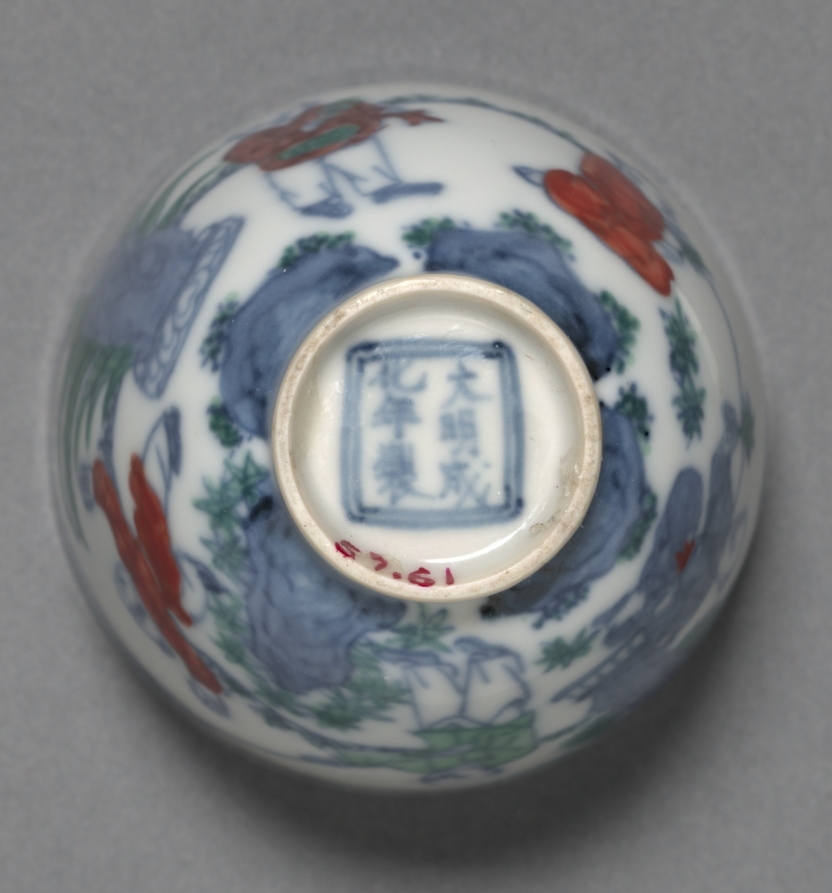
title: Wine Cup with Children at Play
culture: China, Jiangxi province, Jingdezhen, Ming dynasty (1368-1644), Chenghua mark and period (1465-1487)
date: 1465–87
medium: porcelain with underglaze blue and overglaze enamel decoration, docai ("joined colors") ware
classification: Ceramic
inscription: 大明成化年製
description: This delicate wine cup, only two inches high, exhibits free, spontaneous drawing as well as perfect compositional balance over its small surface area. The motifs were outlined with cobalt blue; the piece was then glazed and fired in the normal way for making the blue-and-white ware. After firing, the outline painting was completed with colored enamels over the glaze. The piece was fired the second time. The pictorial decoration is refined and complicated; the porcelain body is of exceptionally high quality and is thin, translucent, and light in weight.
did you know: Chenghua ware demonstrates one of the high points of technological accomplishment in Chinese porcelain production.